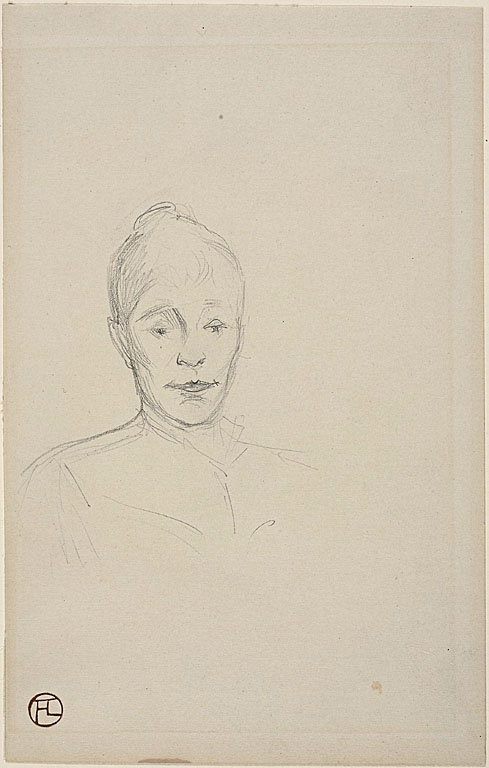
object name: Drawing and Watercolor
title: Study: Face of Woman with High Collar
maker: Henri de Toulouse-Lautrec (French, 1864-1901)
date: c. 1894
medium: Graphite on ivory wove paper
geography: France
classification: chalk; drawings (visual works); prints and drawing